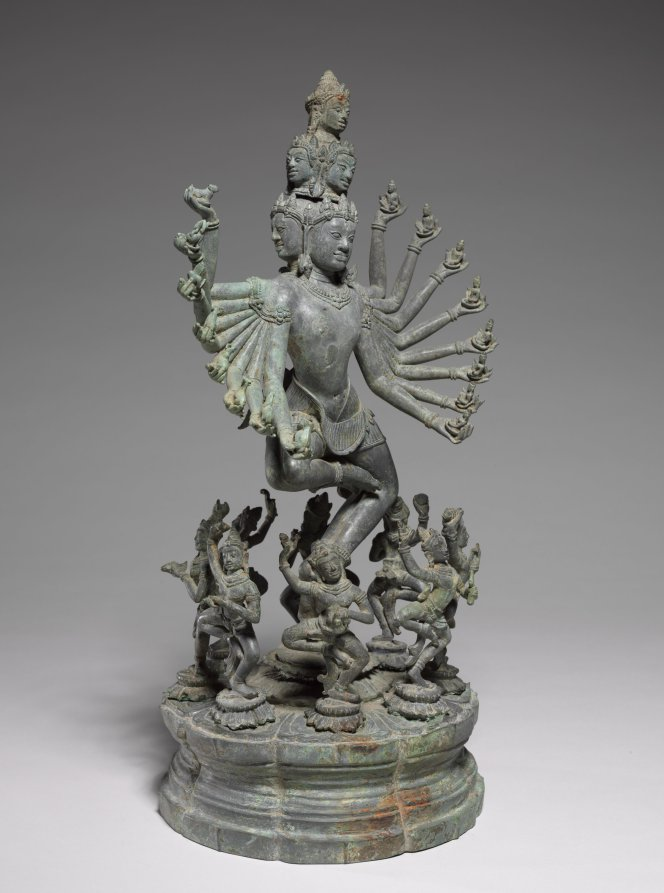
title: Hevajra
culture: Northeastern Thailand, former kingdom of Angkor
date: c. 1200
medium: Bronze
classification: Sculpture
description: Hevajra was an important figure signaling the practice of Buddhist rituals. King Jayavarman VII placed particular emphasis on Hevajra during consecration rituals and set up a colossal stone sculpture of dancing Hevajra at the east gate of his fortified city in the Khmer capital at Angkor. In the Cambodia of Jayavarman VII, tantric Buddhism became public and widespread, practiced together with other more mainstream forms of Buddhism, Hinduism, and ancestor worship. The iconography of Hevajra is described in detail in a text that bears his name, the Hevajra-tantra, first composed in India probably in the 800s. Hevajra has eight heads, sixteen arms, and four legs. His left hands hold images of Indic gods; wealth, death, sun, moon, fire, wind, water, and earth. In his right hands are animals: bull, lion, human, cat, camel, sheep, horse, and elephant. They all sit in skull cups, objects also used in tantric rituals. He dances on a corpse that embodies ignorance and is surrounded by eight yoginis who dance triumphantly in a ring around him. Yoginis functioned as intercessors between human practitioners and enlightened beings. Many bronze images of Hevajra were made during the reign of Jayavarman VII, but few survive in as pristine condition as this example. According to scientific analysis and curatorial reports, this sculpture survived in a clay vessel submerged in water, which accounts for its high tin content and unusual gray patina. Samples from the clay core reveal the presence of the mineral feldspar, a characteristic of clay from the Isaan plateau, on the other side of the mountain range not far from Banteay Chhmar, in present-day Thailand.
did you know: Hevajra, the Tantric Buddhist deity who personifies Enlightenment, dances vigorously to symbolize the human soul's liberation from the snare of existence.